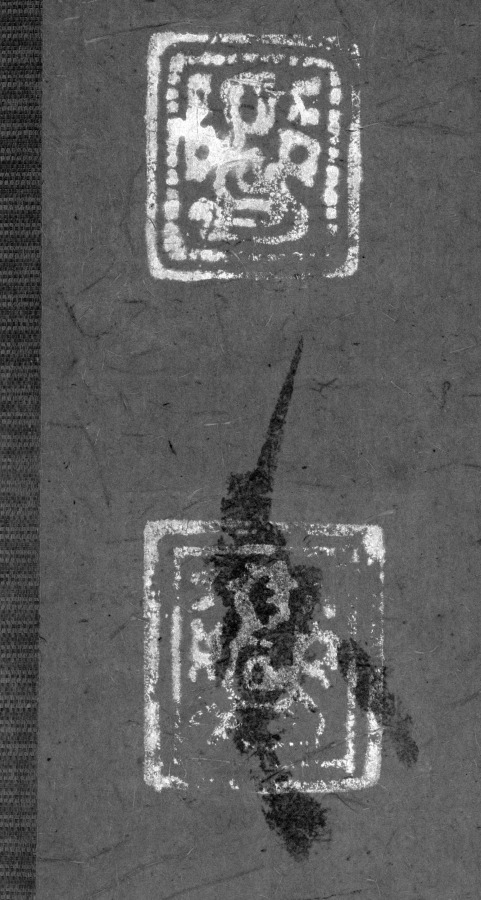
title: Tenjin Traveling to China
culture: Japan, Momoyama period (1573–1615)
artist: Konoe Nobutada (Japanese, 1565–1614)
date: 1610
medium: hanging scroll; ink on paper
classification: Painting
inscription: signed: Nobutada's cipher signature kao inscribed: two poems above, dated Keicho 15